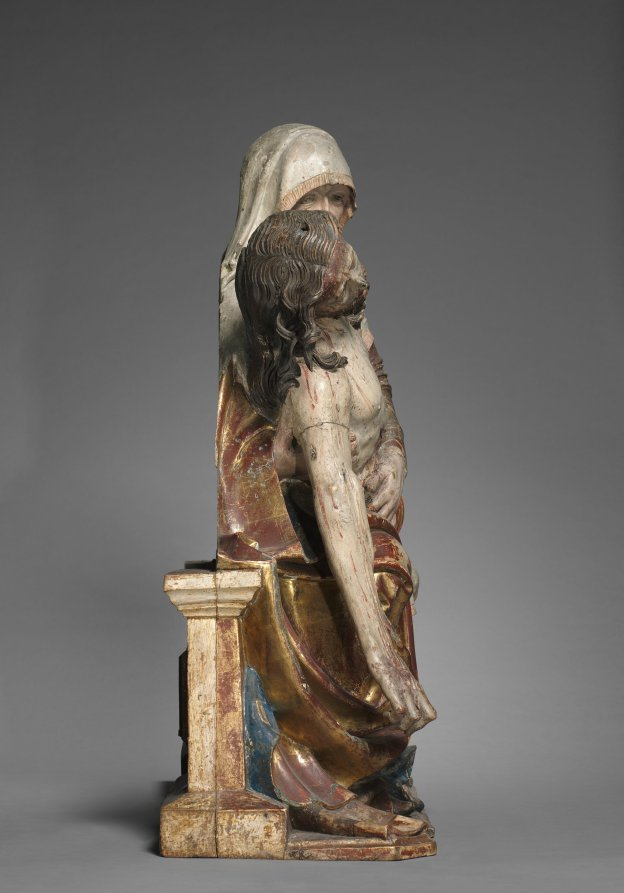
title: Vesperbild (Pietà)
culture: Germany, Upper Bavaria, 16th century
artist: Master of Rabenden (German)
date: c. 1515–20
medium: lindenwood, polychromed and gilded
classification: Sculpture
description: Depicting the Virgin cradling Christ’s dead body, works like this one were known in German as vesperbilds, owing to their incorporation into the liturgy of the evening prayer (vespers) on Good Friday. The word pietà—from the Latin pietas, meaning "piety" or "compassion"—was also used to describe such works. Like other devotional image types that emerged in southern Germany in the later medieval period, vesperbilds encouraged viewers to contemplate Christ’s suffering and empathize with the Virgin’s sorrows more directly and emotively than ever before. This anonymous German artist is named after one of his most important works, the high altar of the church of Rabenden in the Chiemgau, the foothills of the Alps. The sculpture was likely placed in a secondary chapel in a Bavarian church.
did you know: This sculpture sensitively depicts the Virgin cradling the body of Christ. This devotional image was likely placed near the altar in a German chapel. Imagine standing in a small, quiet chapel looking up at these lifelike figures with flickering candles casting dappled light onto their surface.